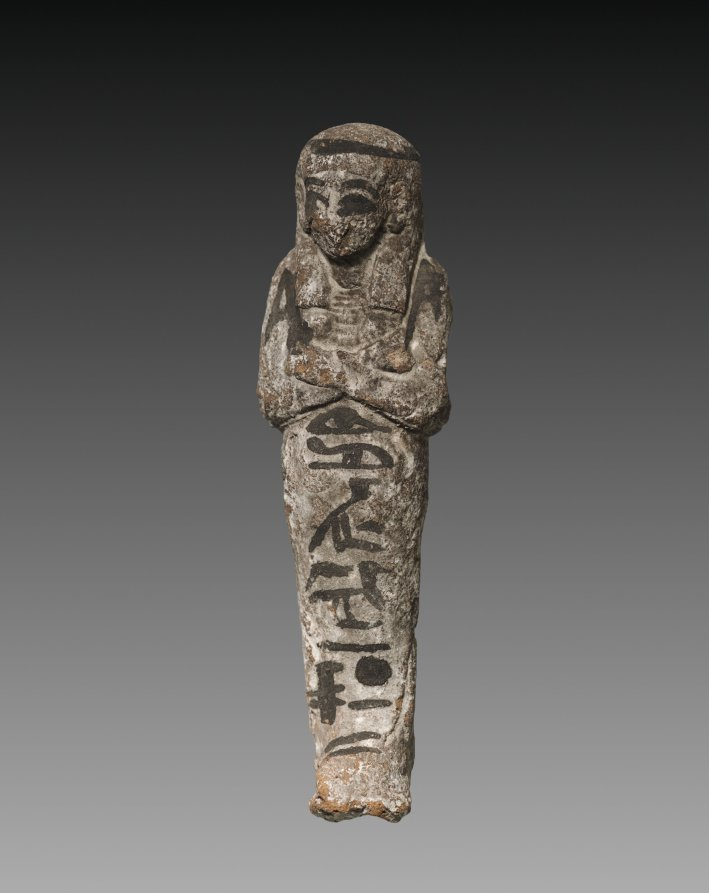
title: Shawabty of Tabaketenkhonsu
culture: Egypt, Third Intermediate (1069–715 BCE), Dynasty 21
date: 1000–956 BCE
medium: painted terracotta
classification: Funerary Equipment